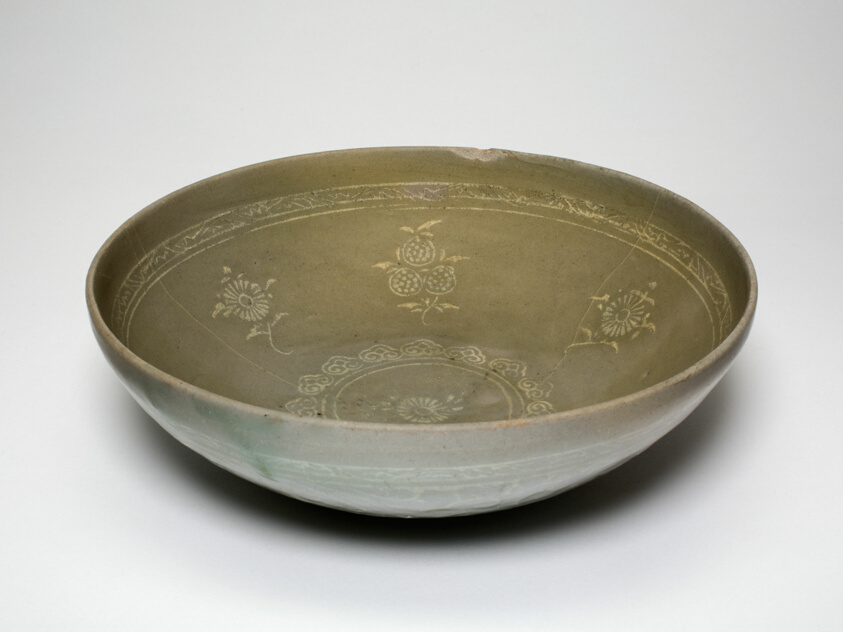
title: Bowl with Chrysanthemum Flower Heads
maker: Korea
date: Goryeo dynasty (918–1392), late 13th century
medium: Celadon-glazed stoneware with underglaze inlaid decoration of white clay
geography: Korea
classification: stoneware; asian art; ceramics